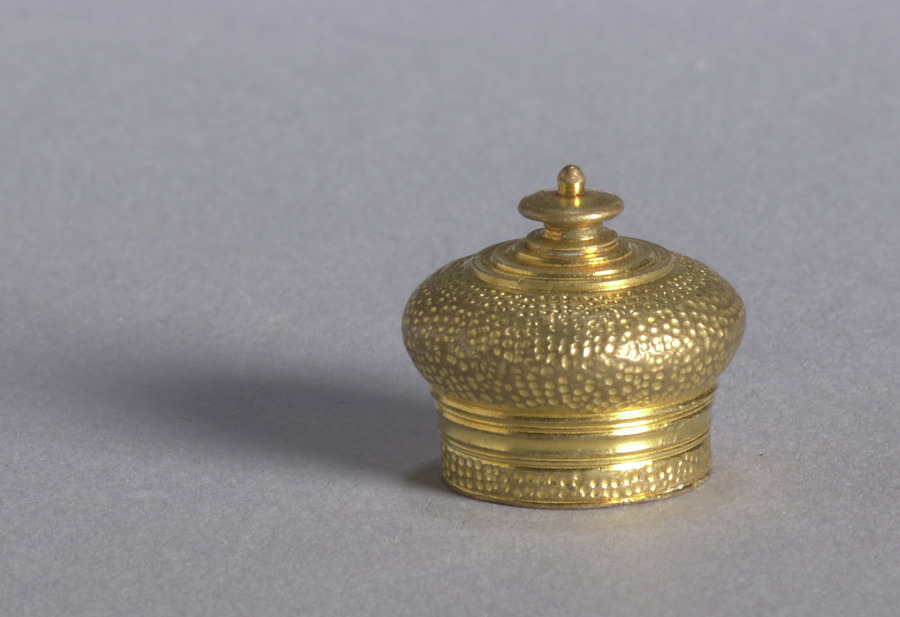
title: Scent Bottle (brass stopper)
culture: Germany, 18th century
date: 1700s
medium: glass with enamel decoration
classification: Miscellaneous